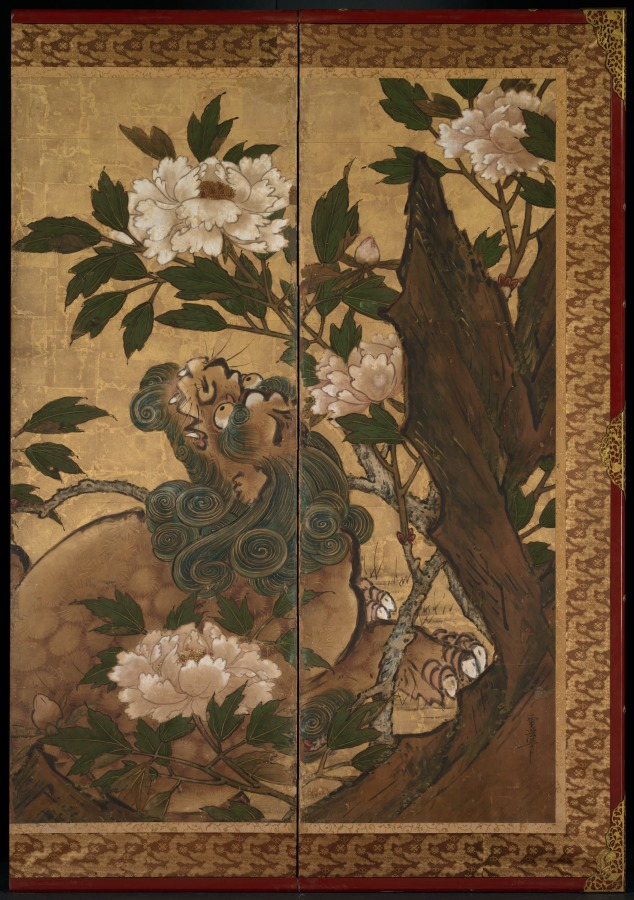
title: Lions and Tigers in Peony and Bamboo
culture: Japan, Edo period (1615–1868)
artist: Yamaguchi Sekkei (Japanese, 1644–1732)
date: 1668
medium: One of a pair of six-panel folding screens; ink and color on gilded paper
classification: Painting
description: Sekkei lived and studied painting in Kyoto at the Kano school studio, the center of traditional painting activity in Japan since 1500. The use of gold foil as a backdrop for the frolicking animals served a practical as well as a decorative function. Because traditional Japanese rooms had no windows, interior lighting came from portable oil lamps and wax candles, whose effects were magnified by reflective surfaces.